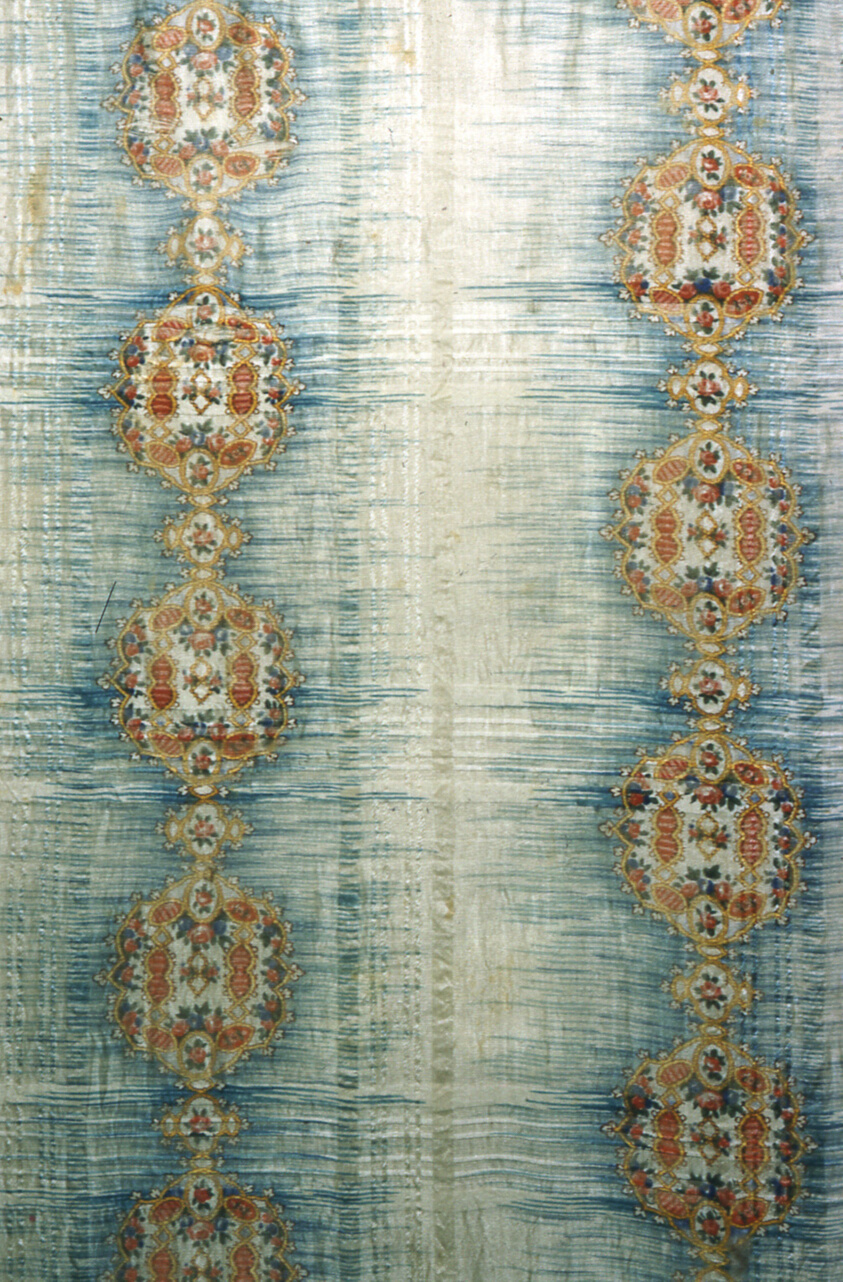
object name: Textile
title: Six Panels from a Skirt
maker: England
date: c. 1856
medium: Silk, plain gauze weave with bands and stripes of warp- float faced twill weave; roller printed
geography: England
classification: textile; weaving - printed; costume